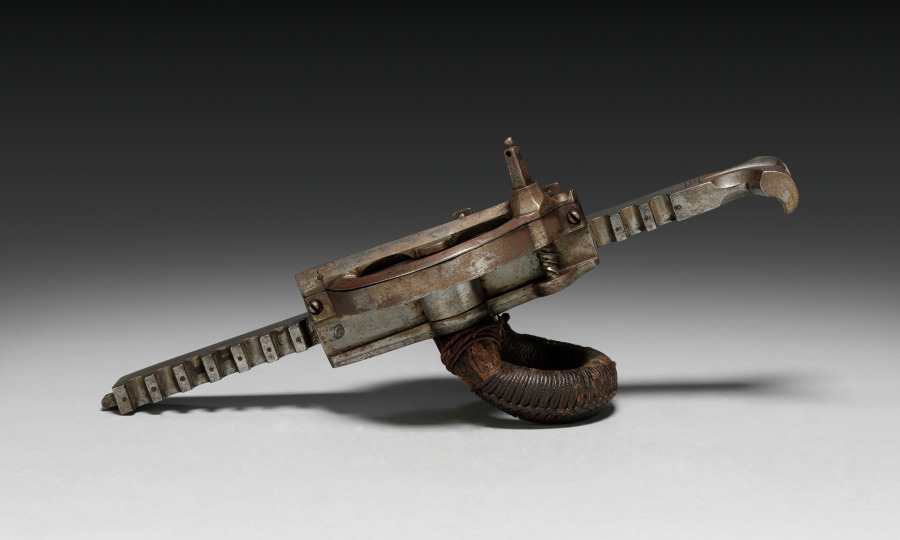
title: Cranequin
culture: Germany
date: 1600s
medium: steel, etched; flax cord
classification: Arms and Armor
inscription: inscribed 1612 (not original); maker's mark (indecipherable)